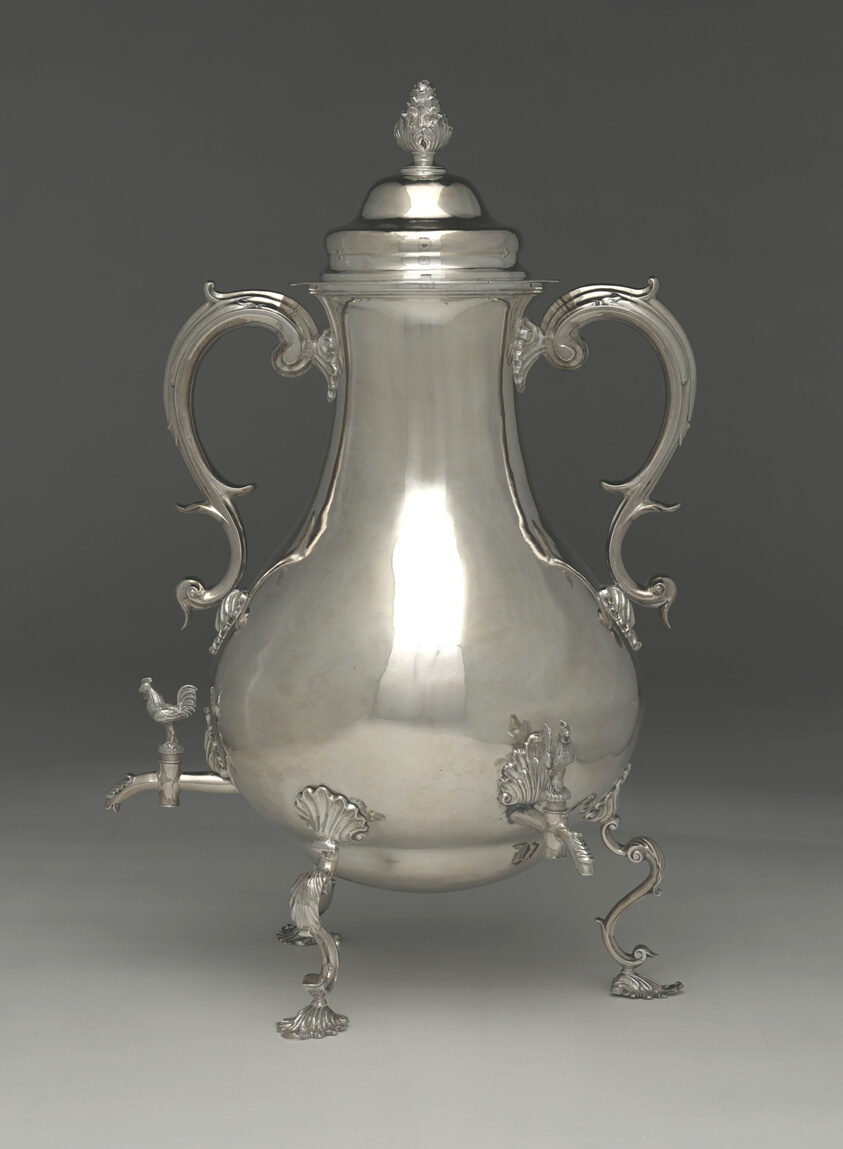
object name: Metalwork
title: Urn with Cover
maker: Ephraim Brasher; American, 1744–1810; New York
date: c. 1770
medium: Silver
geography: New York City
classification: vessel for serving drinks; silver; american decorative arts; american arts; decorative arts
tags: dining, drinking